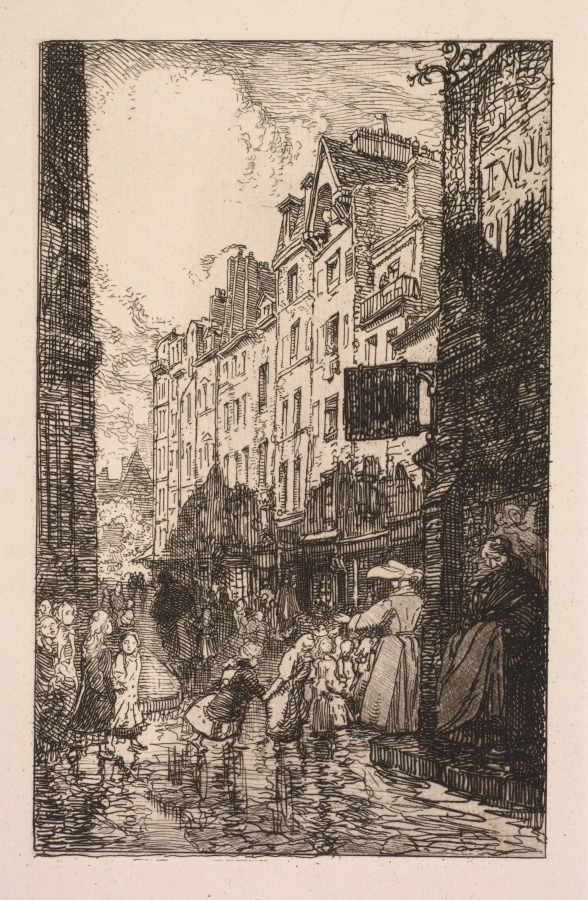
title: La Biévre, Les Gobelins, Saint-Séverin: Le Quartier Saint-Séverin: La Rue des Prêtres Saint-Séverin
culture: France, 19th century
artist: Auguste Louis Lepère (French, 1849–1918)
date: 1901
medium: etching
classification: Print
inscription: Bottom margin, in graphite: A LEPERE (not in artist's hand); verso, in graphite: Lepere; Sister (upside down)